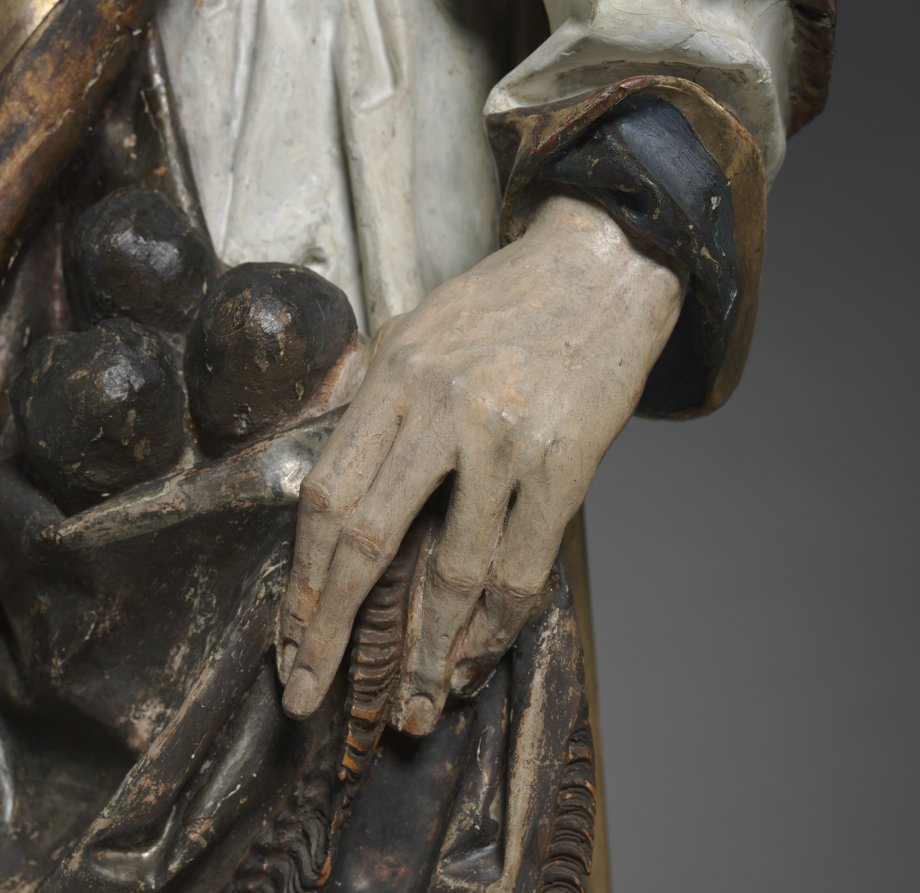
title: Saint Stephen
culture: Germany, Würzburg, 16th century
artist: Tilman Riemenschneider (German, active Würzburg, c. 1460–1531)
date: 1502–8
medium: lindenwood with polychromy and gilding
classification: Sculpture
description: This sculpture, along with that of Saint Lawrence (1959.42) and two others in Germany, are believed to be the remaining fragments of a large altarpiece carved by Riemenschneider for the Dominican convent in Rothenburg in Franconia (demolished in 1813). Saints Stephen and Lawrence both wear the dalmatic to indicate their status as deacons in the early church. Each holds a symbol of his martyrdom; here, Saint Stephen cradles some stones to indicate his death by stoning. Art in Germany through the early 1500s remained firmly anchored in the late Gothic style with its associated interests in realism. Riemenschneider was one of the most prolific and versatile sculptors of this style, a recognized master in both stone and wood. His flourishing workshop employed as many as 40 apprentices in sculpting, woodcarving, and painting. His sculptures are noted for the dreamy, melancholy, and introspective quality in their expressions, as well as their remarkable attention to detail.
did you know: Tilman Riemenschneider (c. 1460–1531) is probably the most famous German sculptor of the period around 1500.